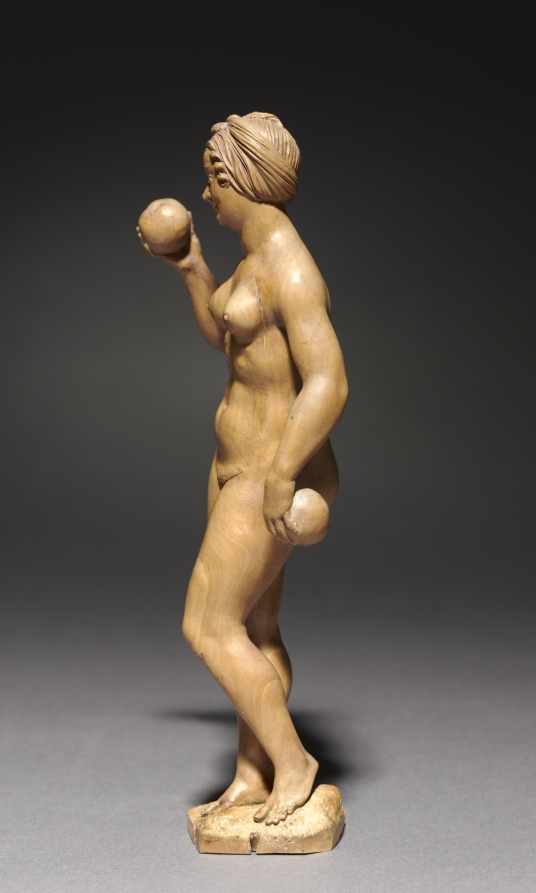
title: Eve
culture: Germany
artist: Daniel Mauch (German, 1477–1540)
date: c. 1535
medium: boxwood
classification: Sculpture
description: Mauch straddled the late medieval and Renaissance traditions across his career. These small-scale statuettes, however, each made from a single piece of boxwood, stem from the most progressive strands of Renaissance art in southern Germany, closely connected to developments in both Italian and German bronze sculpture. The bodies reveal Mauch's careful study of human anatomy as well as a rapport with Albrecht Dürer's well-known print of the same subject.